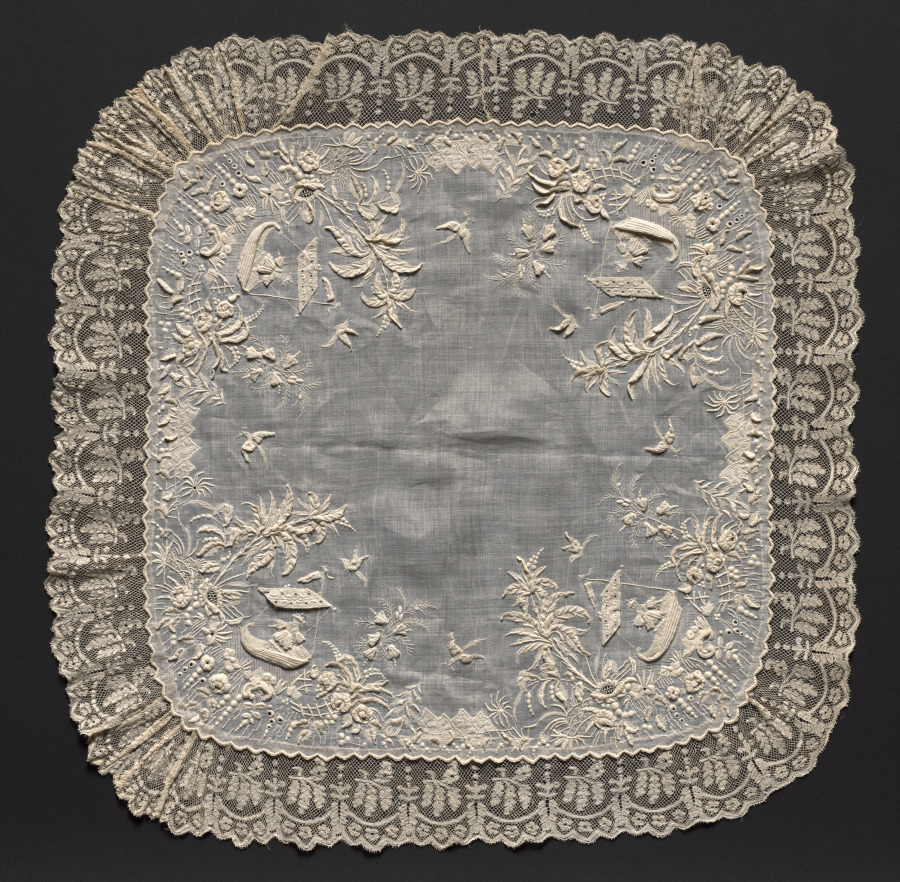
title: Lace Handkerchief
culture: Switzerland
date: 1857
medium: Plain weave linen center with bobbin lace (Valenciennes lace) edging and embroidery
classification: Embroidery